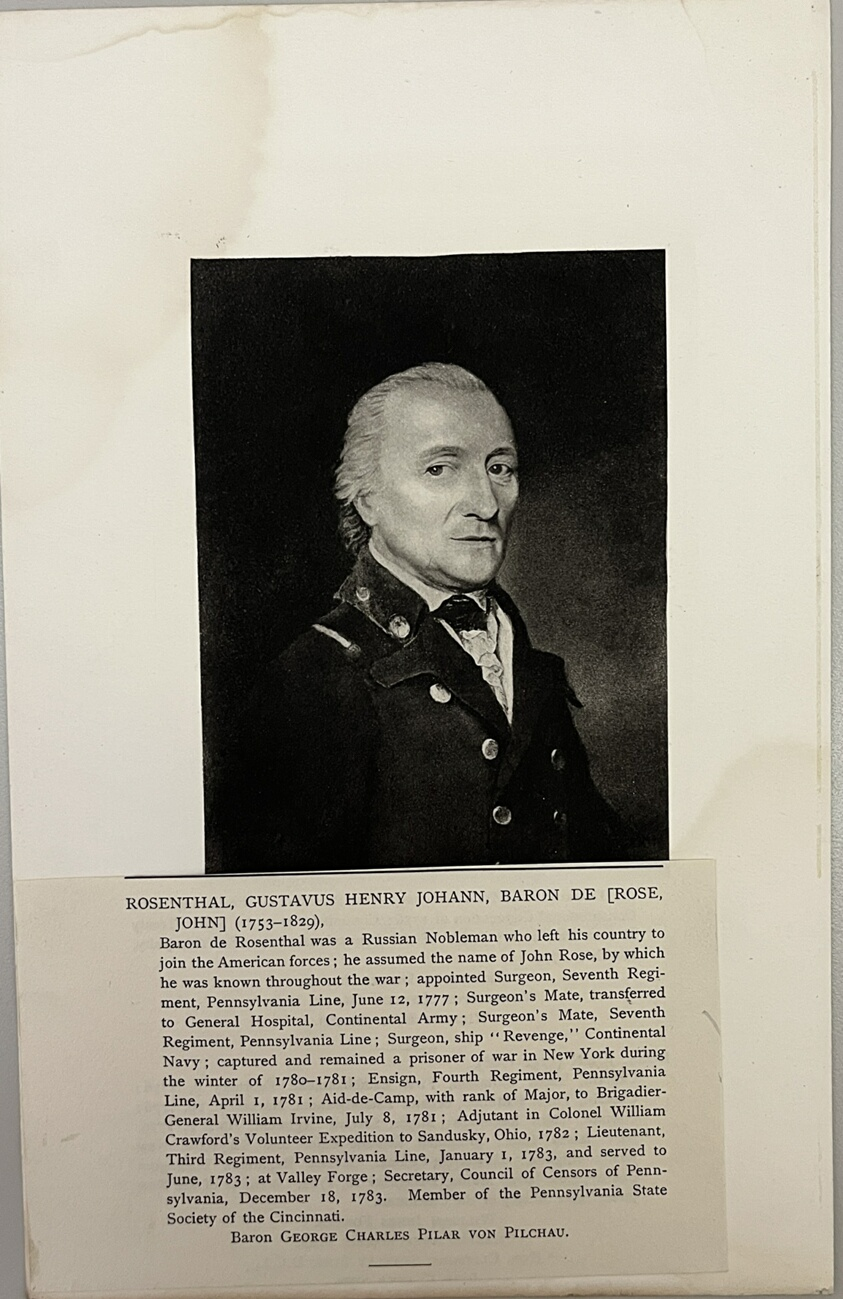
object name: Print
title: Baron de Gustavus Henry Johann Rosenthal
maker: Artist Unknown (Likely American or British, 19th century)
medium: Photolithograph with printed text pasted to support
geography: United States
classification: reproduction; print; prints and drawing